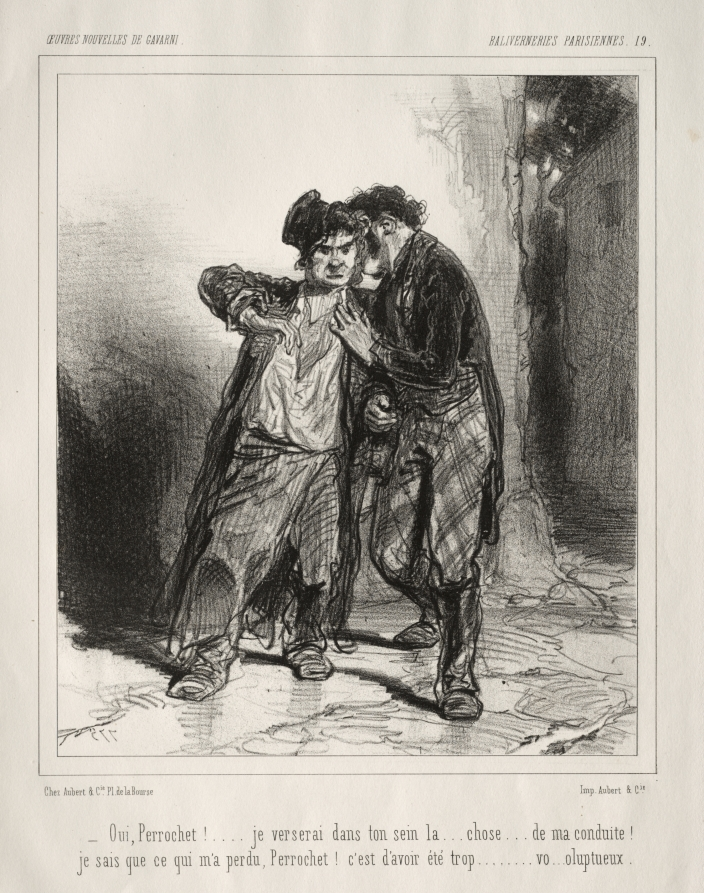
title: Baliverneries Parisiennes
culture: France, 19th century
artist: Paul Gavarni (French, 1804–1866)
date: c. 1847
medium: lithograph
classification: Print